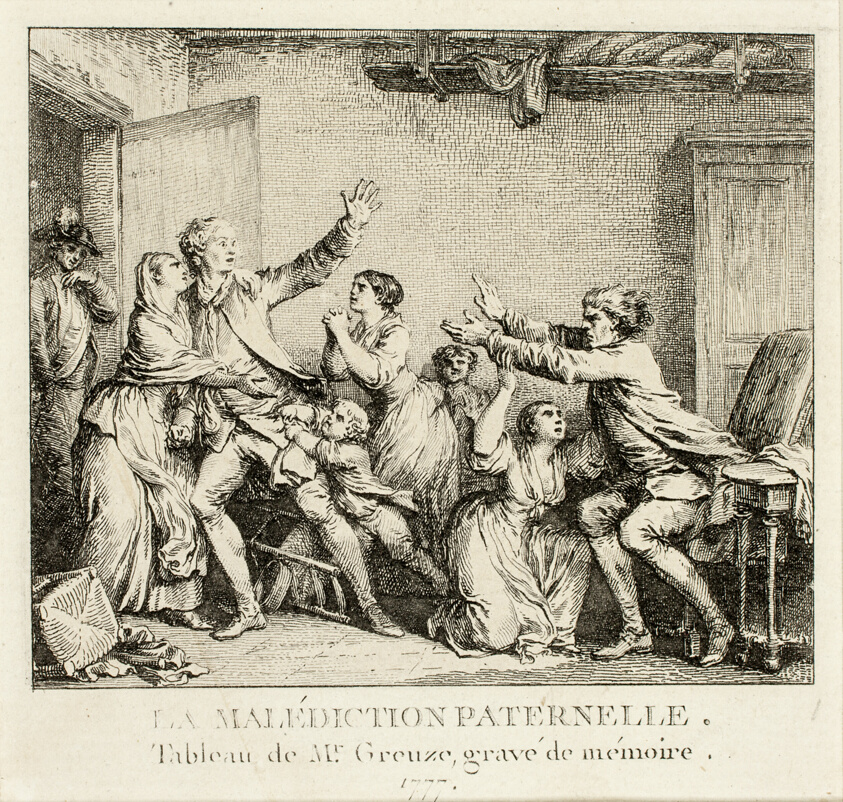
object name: Print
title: Paternal Curse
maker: Jean Michel Moreau (French, 1741-1814); after Jean-Baptiste Greuze (French, 1725-1805)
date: 1777–78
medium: Etching with engraving on paper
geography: France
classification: etching; print; prints and drawing